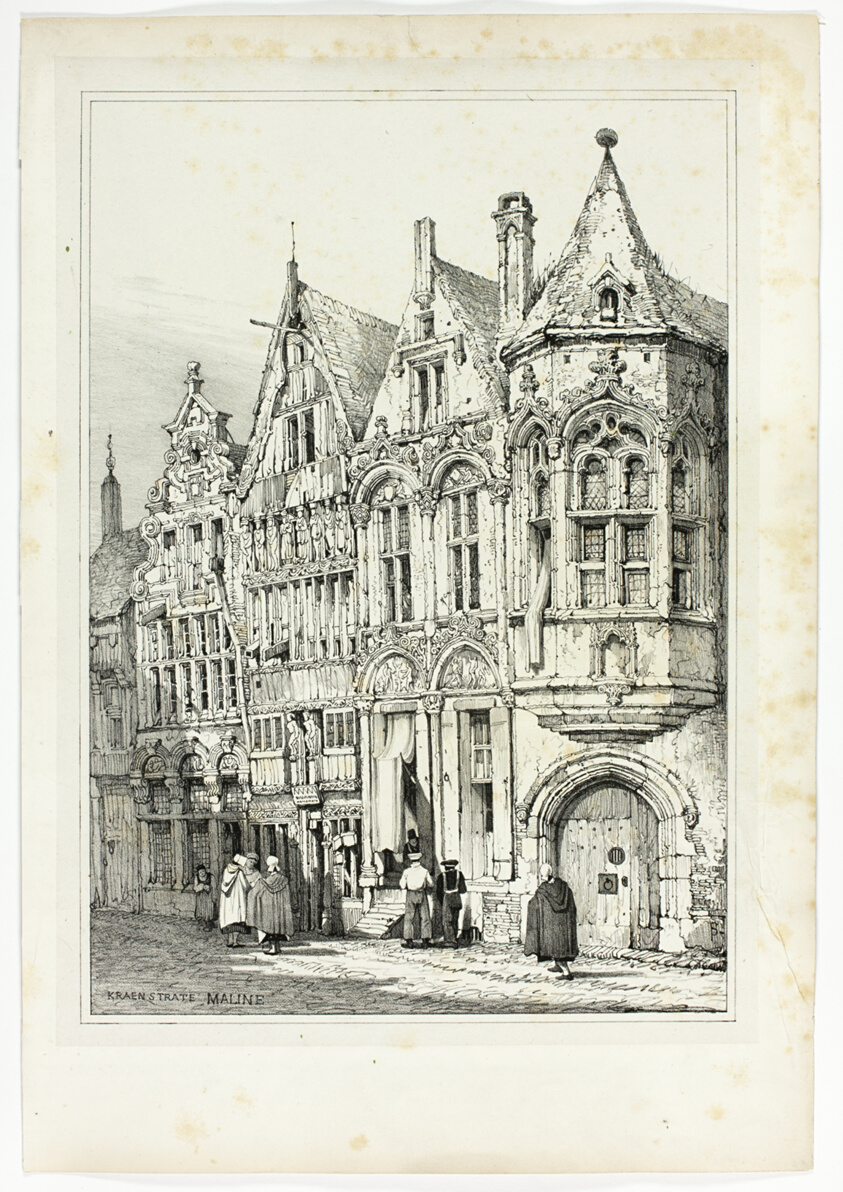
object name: Print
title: Kraenstrate Maline, from Facsimiles of Sketches made in Flanders and Germany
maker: Samuel Prout (English, 1783-1852); printed by Charles Joseph Hullmandel (English, 1789-1850)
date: 1833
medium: Lithograph in black on grayish-ivory chine, laid down on ivory wove paper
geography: England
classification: lithograph; print; prints and drawing